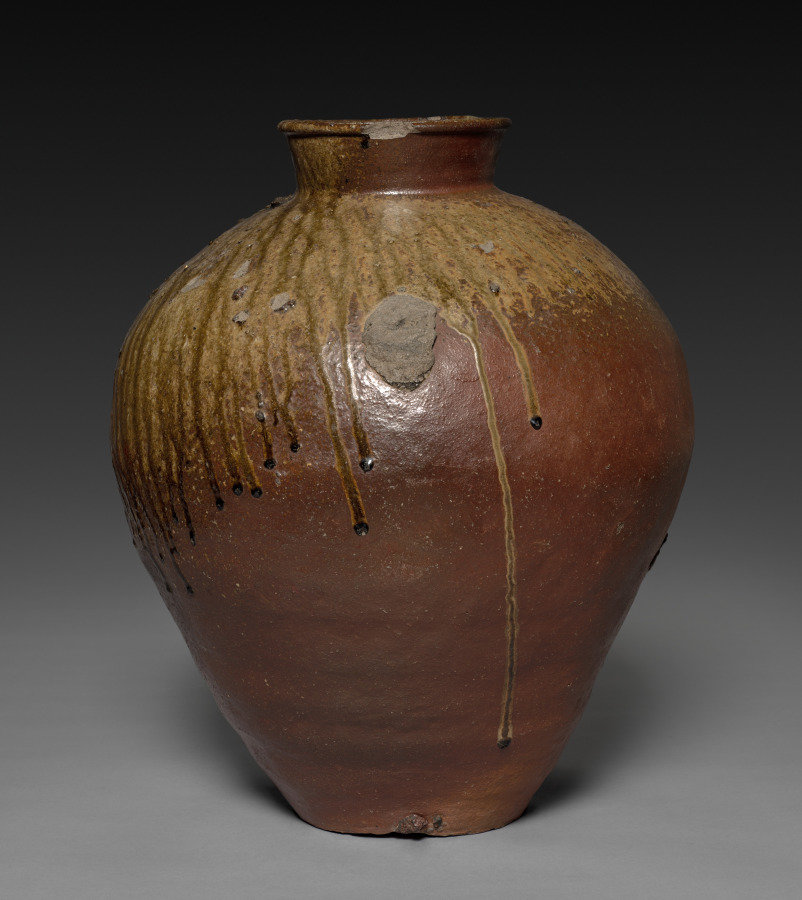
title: Storage Jar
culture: Japan, Muromachi period (1392–1573)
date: 1400s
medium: Stoneware with natural ash glaze (Echizen ware)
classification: Ceramic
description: Located in present-day Fukui prefecture northeast of Kyoto, the Echizen kilns produced ceramics with purplish-red skin flecked with white feldspar characteristic of the local clay used in this piece. Around 1700, the warm hue of Echizen wares gained popularity in tea practice, particularly when the vessels exhibited the rugged surface evident here in combination with the dynamic glossy glaze drips.